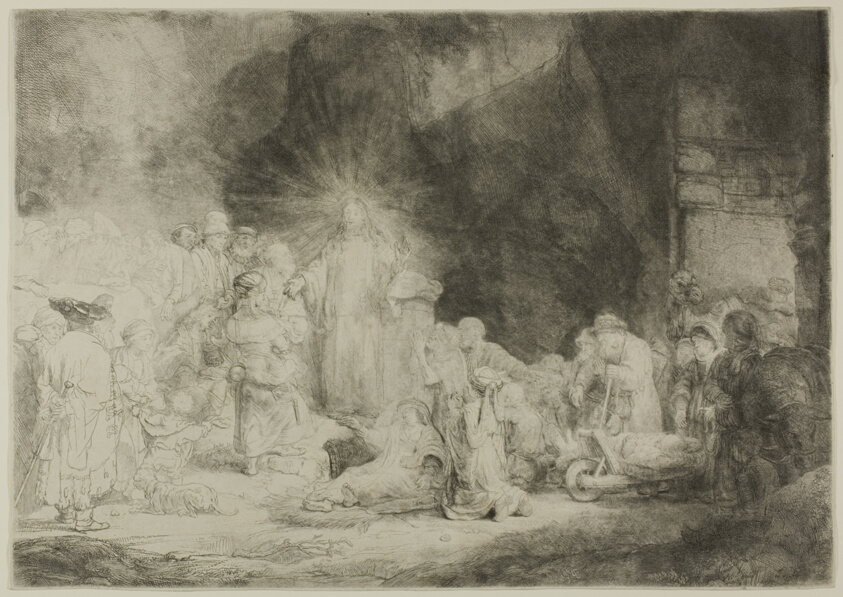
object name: Print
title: The Hundred Guilder Print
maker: Rembrandt van Rijn (Dutch, 1606-1669)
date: c. 1648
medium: Etching and drypoint on off-white laid paper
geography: Holland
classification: etching; print; prints and drawing; paper; drypoint